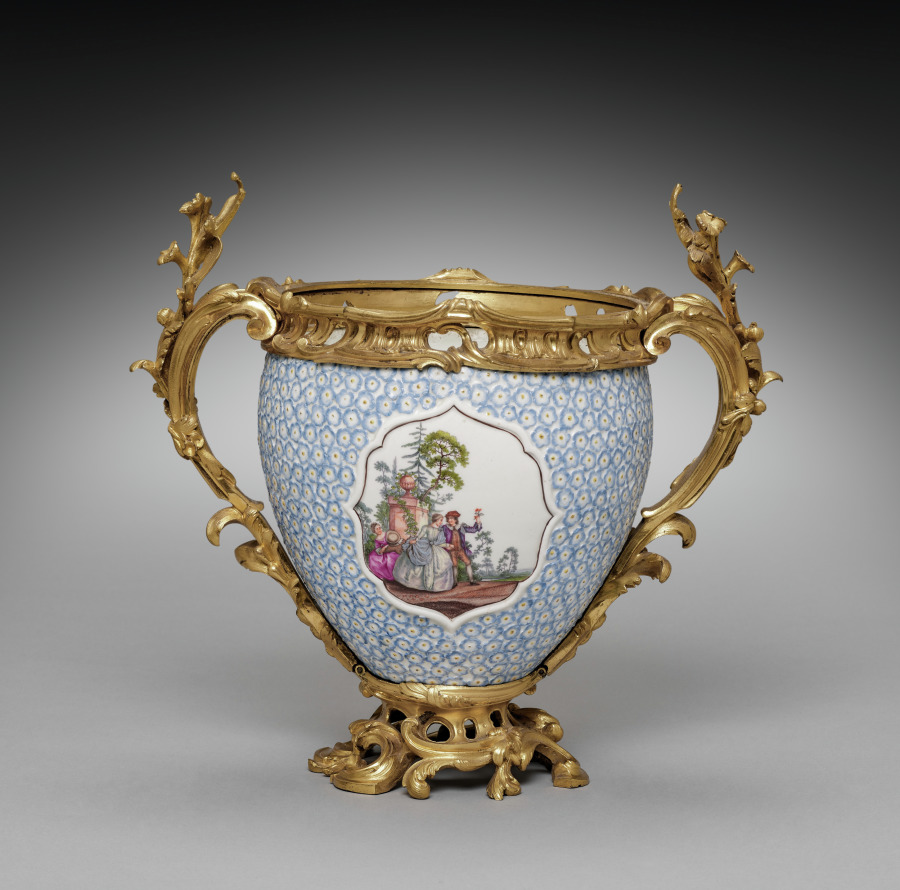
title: Vase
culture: Germany, Meissen, 18th century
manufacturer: Meissen Porcelain Factory (German, est. c. 1710)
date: 1749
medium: porcelain mounted in gilt bronze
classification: Ceramic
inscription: on obelisk located in one of the cartouche openings, the date 1749 appears.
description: One of these vases is dated 1749. They were perhaps part of a set of four covered vases that we know from documents were acquired by Mme. de Pompadour, mistress of Louis XV in 1752.